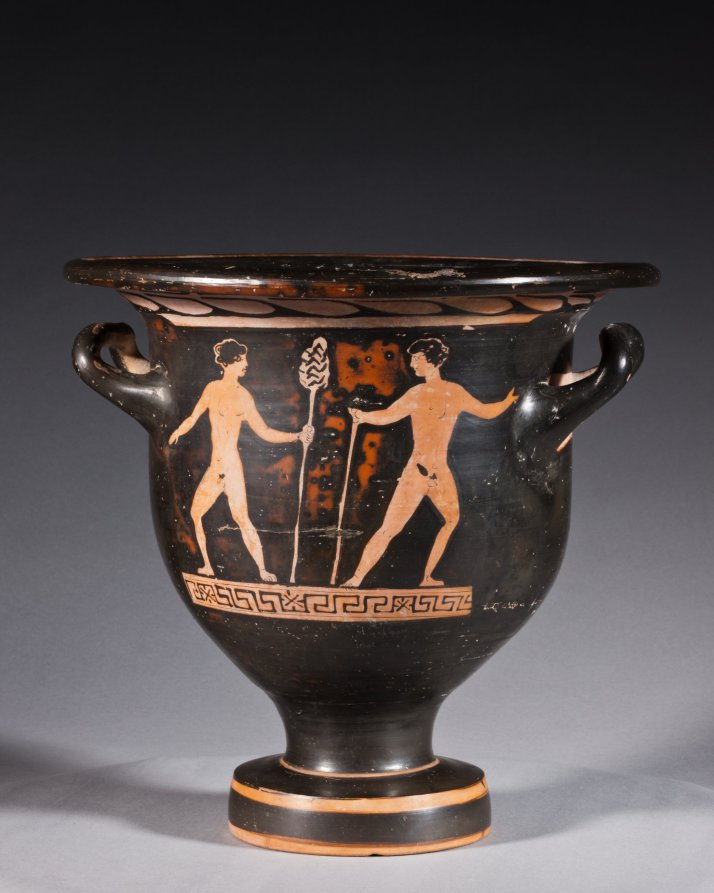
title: Red-Figure Bell Krater (Mixing Vessel): Aphrodite and Eros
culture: South Italian, Apulian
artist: attributed to Graz Painter (South Italian, Apulian, active c. 380–360 BCE)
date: c. 370–360 BCE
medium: ceramic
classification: Ceramic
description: This small mixing vessel shows a finely dressed woman seated on a chest and holding up a mirror to admire herself. Before her stands Eros, the winged god of love, holding a ribbon or sash. Behind the woman stands a pillar with the inscription ΑΦΡΟΔΙΤΗ, or APHRODITE, the goddess of love. Such labels are rare on vases, and scholars debate whether this names the woman shown as Aphrodite herself, with her son Eros, or a bride envisioning herself as Aphrodite, just before her wedding.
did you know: The dancing nude youths on the reverse are unusual; typically they would be standing and draped.